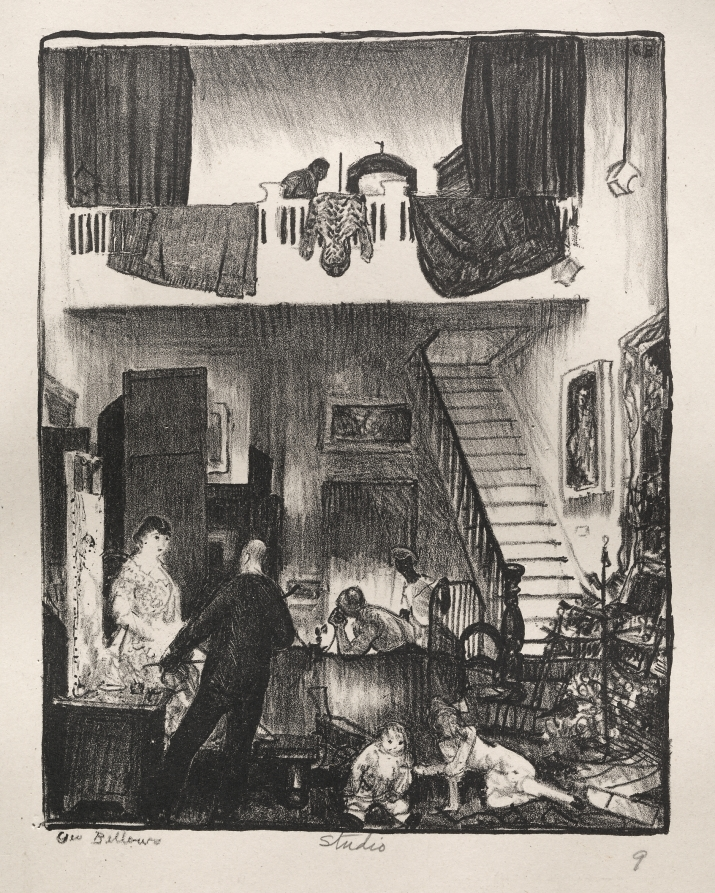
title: The Studio, Christmas 1916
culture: America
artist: George Bellows (American, 1882–1925)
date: 1916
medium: lithograph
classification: Print